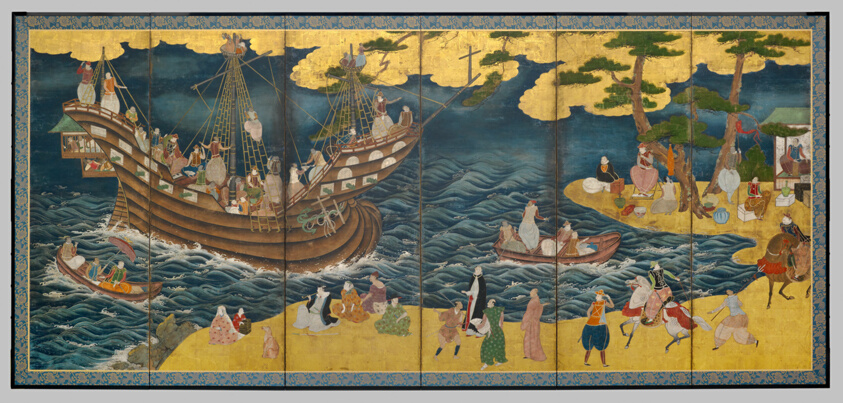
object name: Furniture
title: Southern Barbarians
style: Japanese (culture or style)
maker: Artist unknown; Japanese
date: mid 17th century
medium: Pair of six-panel screens; ink, colors, and gold on paper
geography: Japan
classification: screen; painting; asian art; furniture